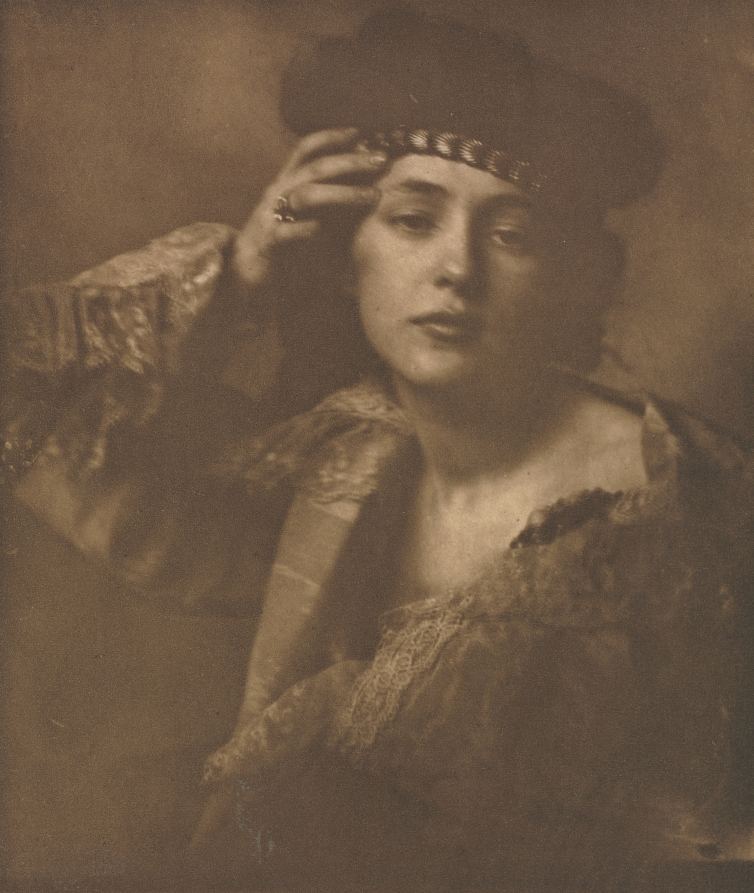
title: Camera Work: Marcella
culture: America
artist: F. Benedict Herzog (American, c. 1859–1912)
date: 1905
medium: photogravure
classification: Bound Volume